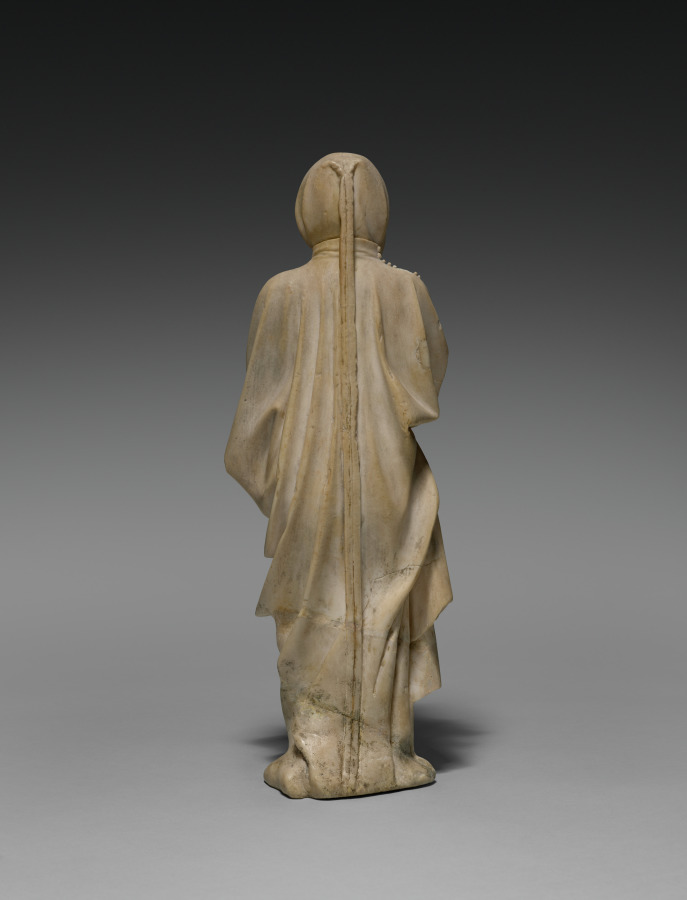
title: Mourner from the Tomb of Philip the Bold, Duke of Burgundy (1364–1404)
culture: Netherlands, active Dijon, 15th century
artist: Claus de Werve (Netherlandish, 1380–1439)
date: 1404–10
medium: vizille alabaster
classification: Sculpture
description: This figure comes from the tomb of Duke Philip the Bold from the church of Champmol near Dijon (Burgundy, France). Philip, who founded the monastery and designated it as his burial place, hired the best artists, many of whom came from the Netherlands. While the commission was given in 1381, the work was not completed until 1410, six years after the duke’s death. This mourner is unusual for the time because it is not carved as a static low relief on the pedestal of the tomb but interacts with the viewers and their fellow procession members. The lifelike quality of the figure is due in large part to the alabaster. Its softness allowed artists to carve details into the material, and the transparent, milky white stone could also be polished to a high gloss.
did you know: A plaster cast of this mourner decorates the empty niche in the Tomb of Philip the Bold in Dijon, France.